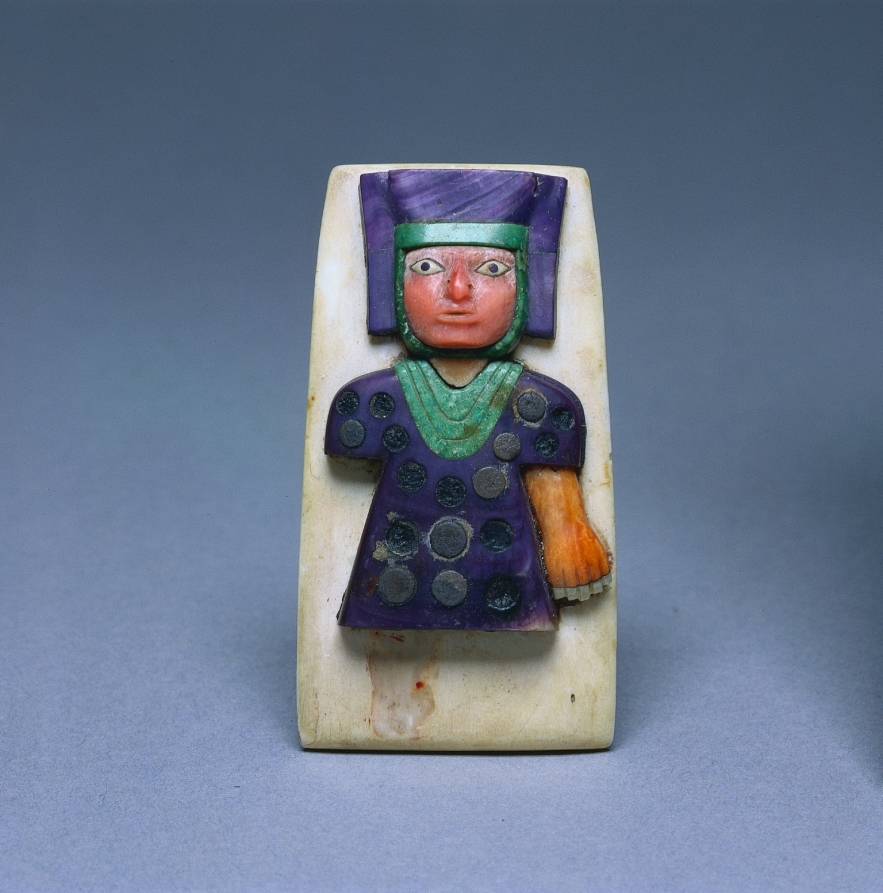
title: Ornament with Figure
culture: Central Andes, Wari style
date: 600–1000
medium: shell, stone, and metal (silver?)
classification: Jewelry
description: Affixed to a section of white shell is the image of a Wari dignitary, assembled of carefully carved mosaic elements. The purple and pink shapes are made of shell, while the green is serpentine. The spots on the figure's tunic are probably pyrite, which was originally smooth and reflective.